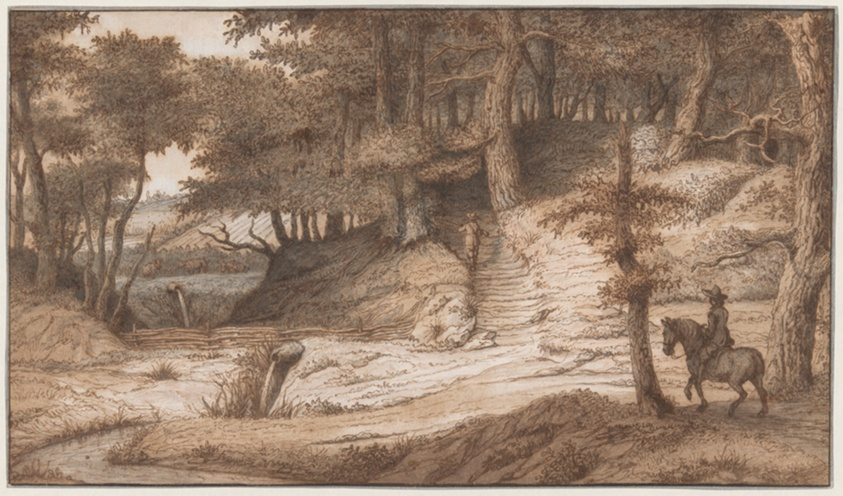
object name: Drawing and Watercolor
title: Horseman and Hunter in the Woods of Doorwerth, Near Arnhem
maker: Lambert Doomer (Dutch, 1624-1700)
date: c. 1670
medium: Pen and brown iron gall ink and brush and brown and gray washes, over black chalk, on ivory laid paper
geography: Netherlands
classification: drawings (visual works); prints and drawing